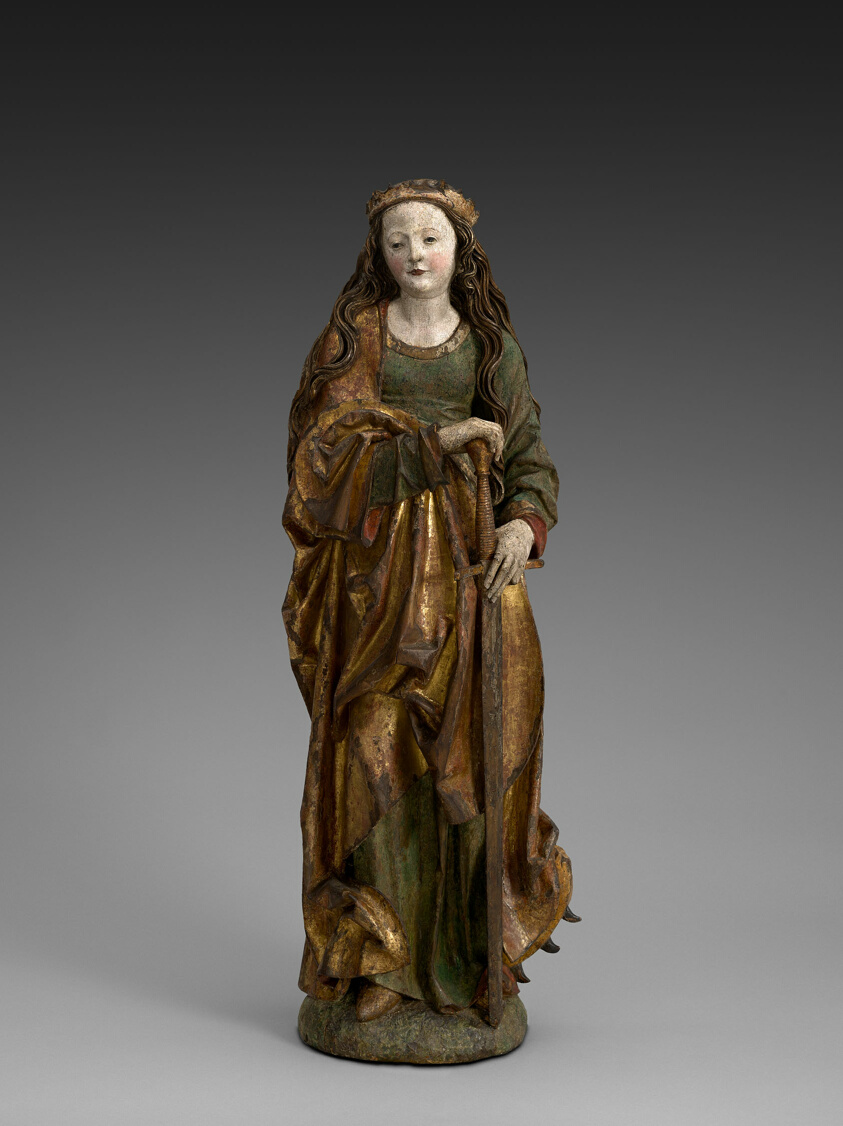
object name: Sculpture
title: Saint Catherine of Alexandria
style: sixteenth century, 16th Century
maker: German; Swabia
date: c. 1515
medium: Lindenwood with some original polychromy and gilding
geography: Germany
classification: large scale; sculpture; german; sculpture/wood; wood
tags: Saint Catherine, brown (color), figure, gold (color), green (color), saints, sculpture, woman